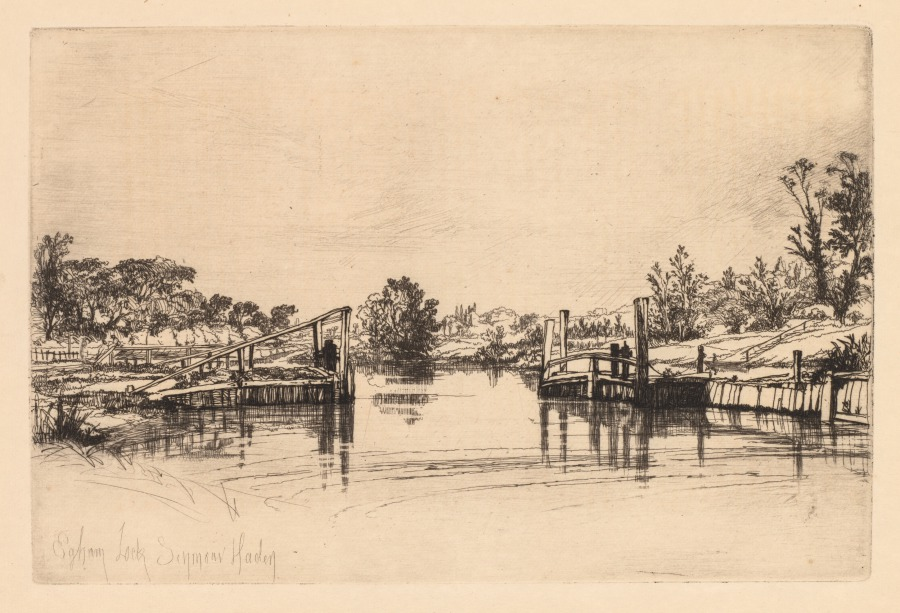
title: Egham Lock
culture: Britain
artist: Francis Seymour Haden (British, 1818–1910)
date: 1859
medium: etching and drypoint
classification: Print